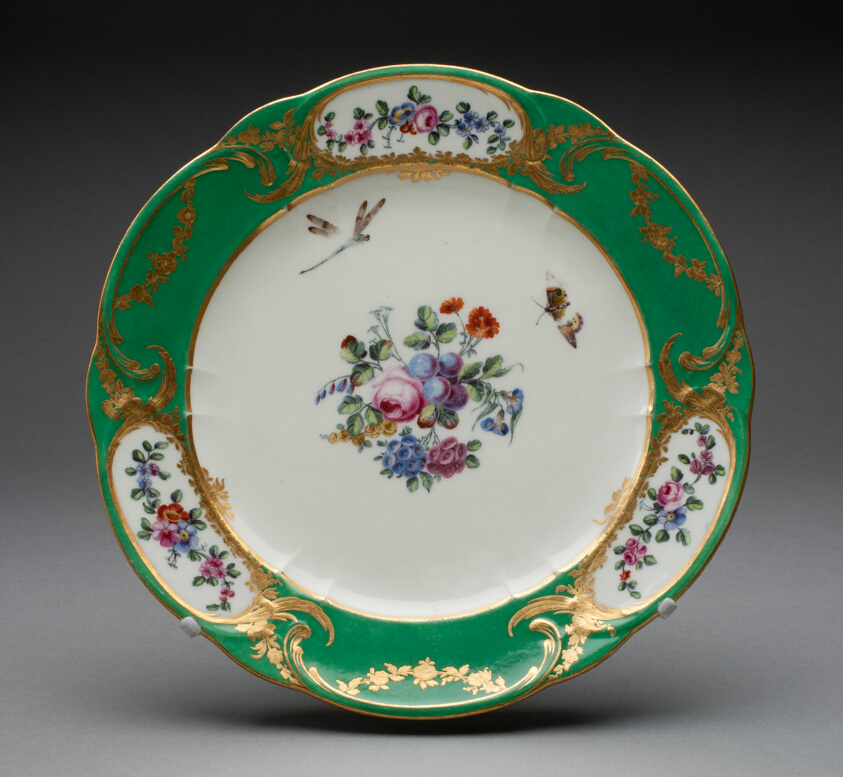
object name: Ceramics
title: Plate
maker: Sèvres Porcelain Manufactory; French, founded 1740; Painted by Guillaume Nöel (French, active 1755-1800)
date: 1765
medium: Soft-paste porcelain with polychrome enamels and gilding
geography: Sèvres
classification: plate (general, dish); tableware; dish (vessel); porcelain; european decorative arts; ceramics